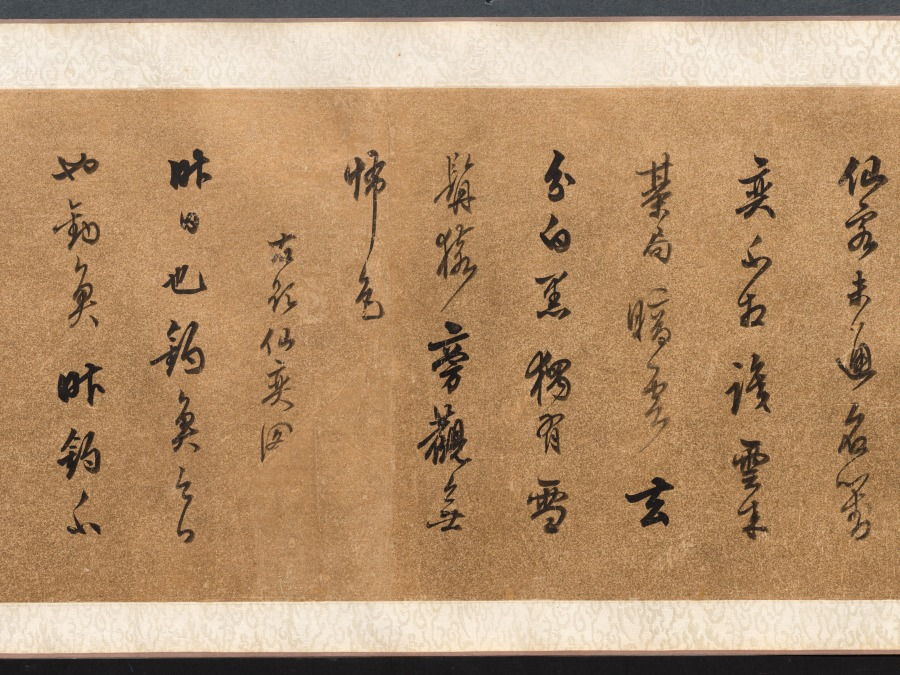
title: Four Poems: Calligraphy in Cursive Script (xingshu)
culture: China, Ming dynasty (1368–1644)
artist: Chen Jiru (Chinese, 1558–1639)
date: 1500s-1600s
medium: handscroll; ink on gold speckled paper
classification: Calligraphy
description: Written in graceful calligraphy with well-composed characters, the artist communicates his thoughts and state of mind in four poems. Characters written in dark, thick strokes convey rhythm, and indicate the moment after the writer had paused to recharge his brush with ink. Chen Jiru was a native of Huating (modern Shanghai). His calligraphy style resembles that of his friend, influential calligrapher Dong Qichang (1555–1636). Unlike Dong, Chen did not pursue government service: he burned his Confucian robes, declined a summons to serve at court, and immersed himself in literature, calligraphy, and painting.